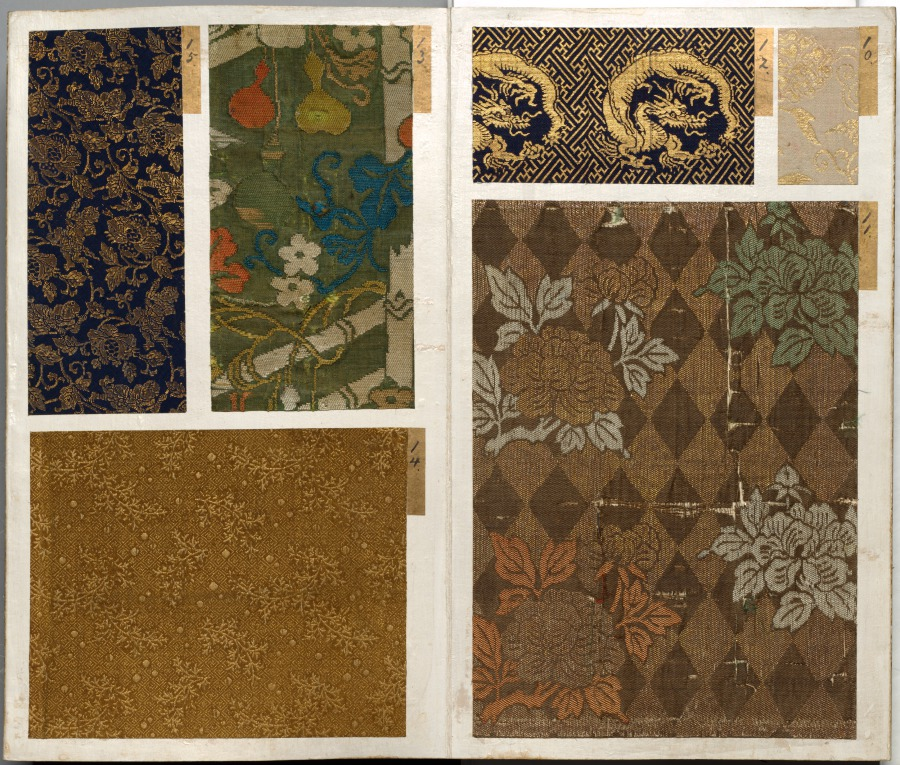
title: Album of Textile Samples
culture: Japan, Edo period (1615–1868)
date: 1600s-1700s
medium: silk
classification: Textile